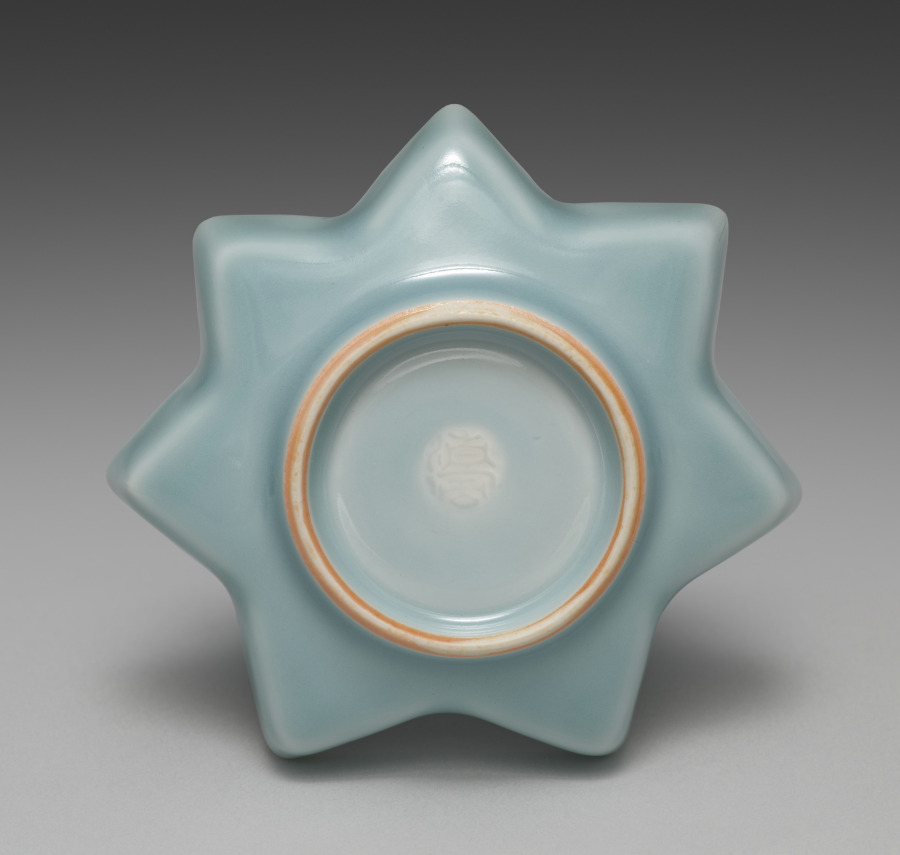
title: Saucer from Maple Leaf-Shaped Saucers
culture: Japan, Meiji period (1868–1912)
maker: Seifū Yohei III (Japanese, 1851–1914)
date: 1893–1914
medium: One of five dishes from a set of ten; porcelain with blue glaze and molded design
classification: Ceramic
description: These maple leaf–shaped saucers, like Yohei III's five shell saucers CMA 2022.188, have a long, horizontal box with a separate compartment for each piece. Now a set of five, these dishes were originally a set of ten, stored in two boxes of five each. From their housings, which accommodate differing numbers of objects, one can hypothesize that while some items created by the Seifu studio were intended to be acquired in larger sets, and thus were perhaps made to order, others, like these, may have been items to be purchased of the shelf in set quantities that allowed clients flexibility in scale. The box for these five saucers describes them as “heavenly blue[–glazed] porcelain” (tenseiji). The veins of the leaves are slightly raised in the clay so that the glaze pools around them and they stand out as white where the glaze thins. There are longer lines at the points of the leaves and shorter ones following the wall of each indentation so that the design has both a horizontal and a subtle vertical dimension.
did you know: These saucers shaped like maple leaves show Seifū Yohei III’s “heavenly blue glaze.”